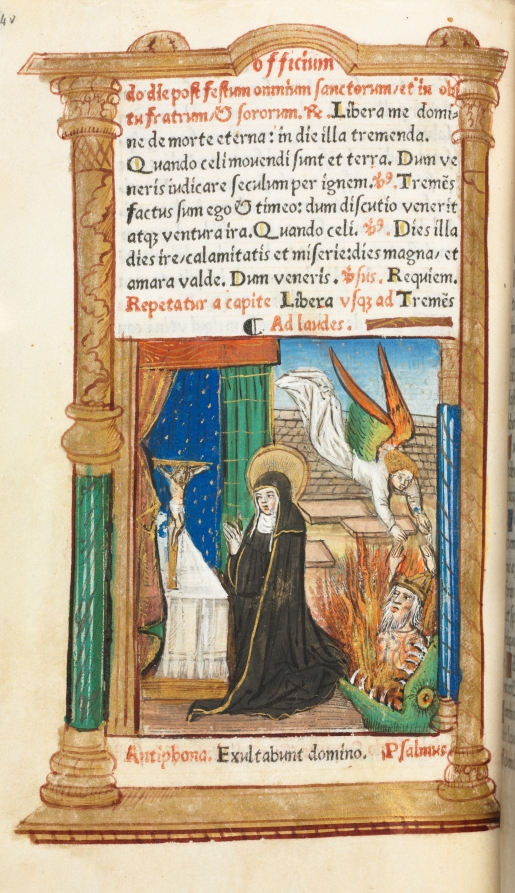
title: Printed Book of Hours (Use of Rome): fol. 84v, Dominican Nun in Prayer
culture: France, Paris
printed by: Guillaume Le Rouge (French, Paris, active 1493–1517)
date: 1510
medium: 112 Printed folios on parchment, bound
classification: Bound Volume